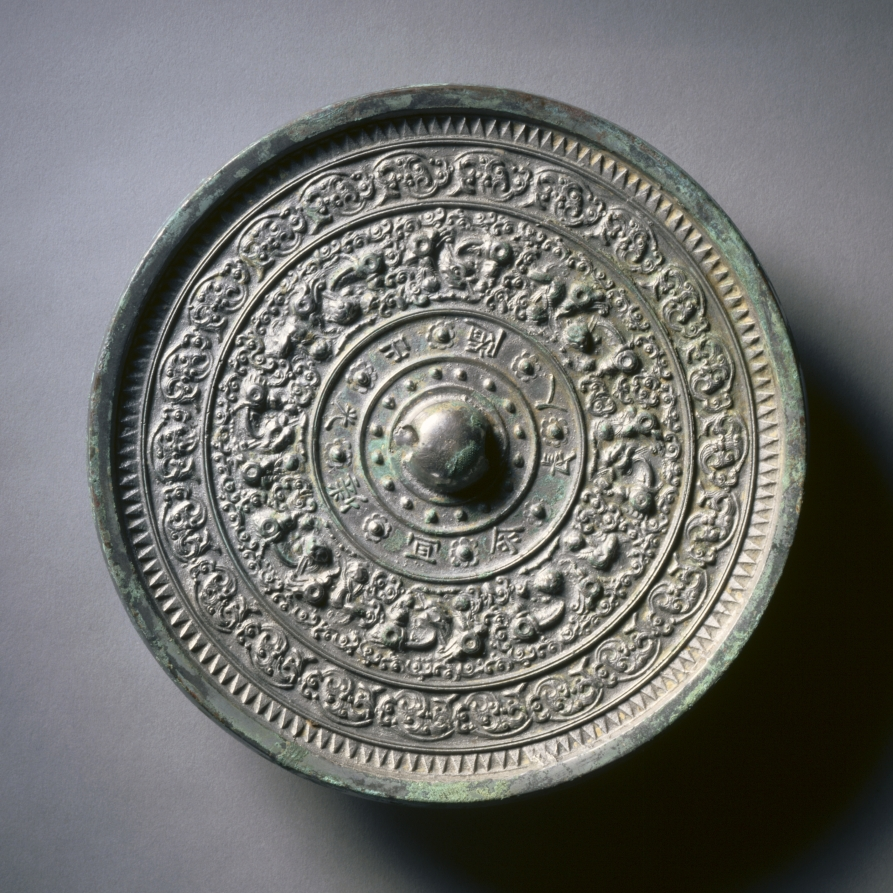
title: Mirror with Deities and Animals in Concentric Circles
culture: China, Sui dynasty (581-618)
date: late 500s–early 600s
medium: bronze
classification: Metalwork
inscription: The mirror's light shows the man inside./ May you live a long life and [constantly] renew yourself.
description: Inscription: The mirror's light shows the man inside. May you live a long life and [constantly] renew yourself.